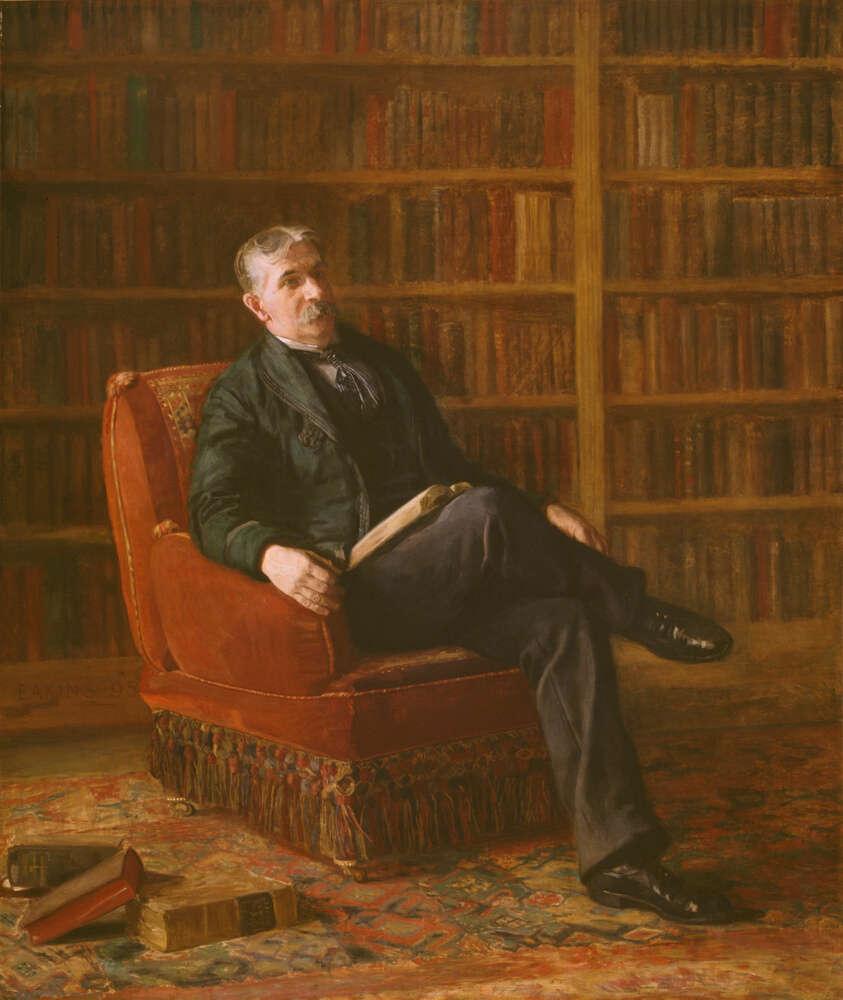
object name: Painting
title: Riter Fitzgerald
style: Realism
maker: Thomas Eakins (American, 1844–1916)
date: 1895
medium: Oil on canvas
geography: Philadelphia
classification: painting; american arts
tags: fashion, people, portraits